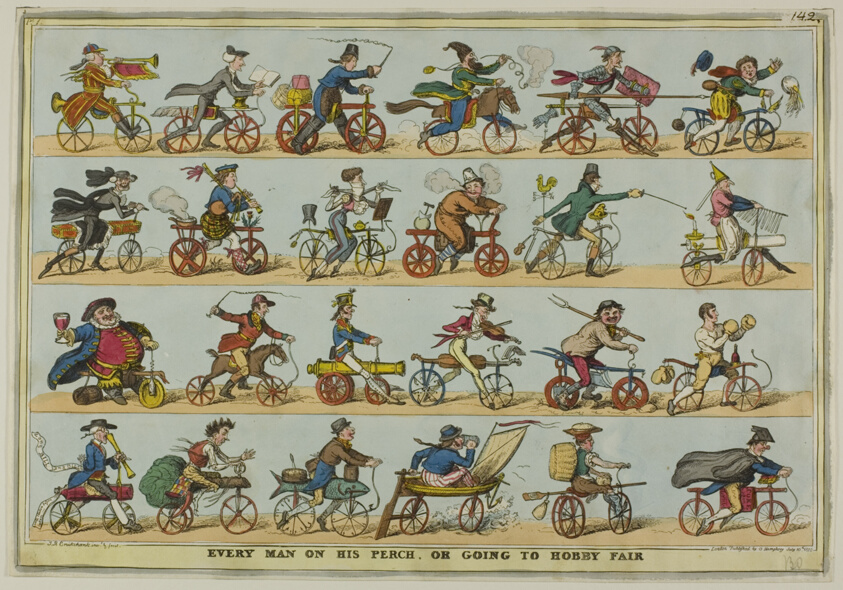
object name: Print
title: Every Man on his Perch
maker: Issac Robert Cruikshank (English, 1789-1856); published by G. Humphrey (English, c. 1773-1831)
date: 1819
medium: Hand-colored etching on paper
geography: England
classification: etching; print; prints and drawing